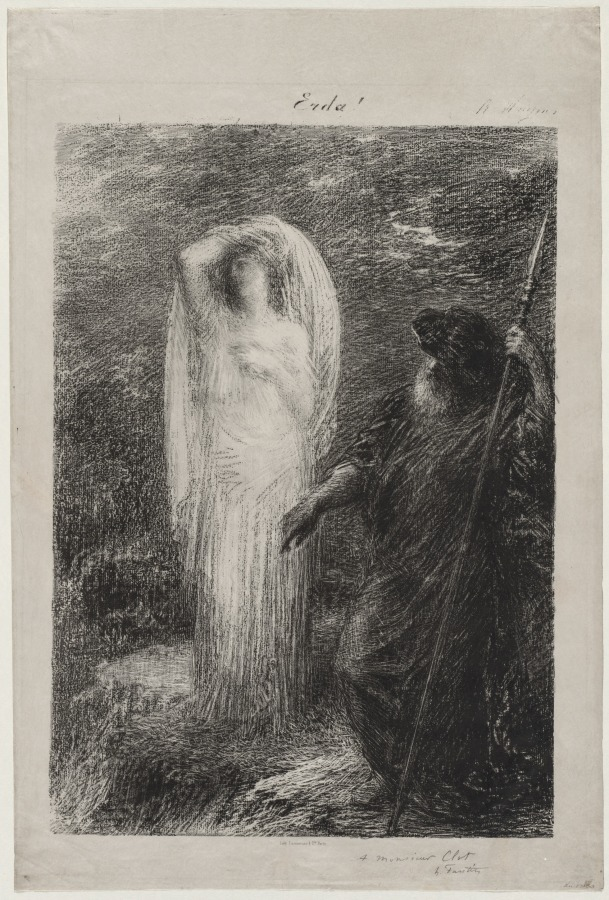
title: L'Evocation d'Erda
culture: France, 19th century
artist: Henri Fantin-Latour (French, 1836–1904)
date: 1885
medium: lithograph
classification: Print